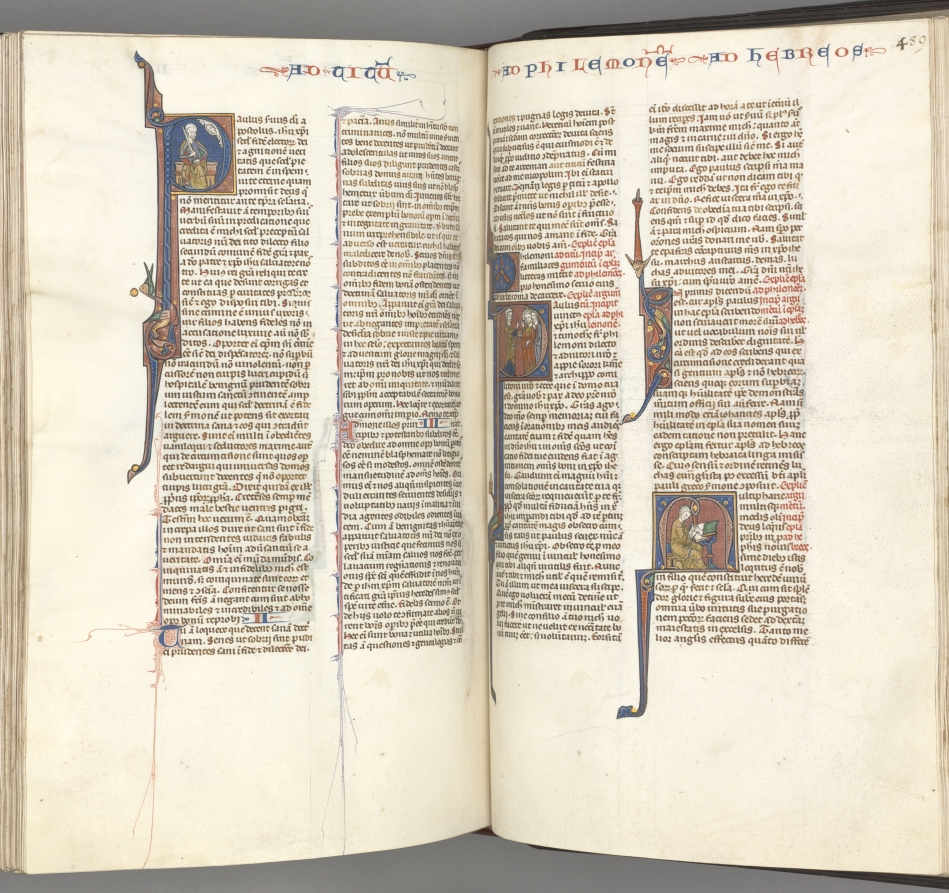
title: Fol. 458v, Titus, historiated initial P, Paul seated with a sword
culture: Southern France, Toulouse(?), 13th century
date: c. 1275–1300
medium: ink, tempera and gold on vellum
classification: Bound Volume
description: Biblical manuscripts were highly prized and important possessions of churches, monasteries, cathedral schools, and universities throughout medieval Europe. The biblical texts were known as the vulgate, the translations made by Saint Jerome in the fourth century from Hebrew and Greek into Latin, which became the definitive and official Latin version of the Roman Church. In the 13th century, the bible was, for the first time, produced as a single volume with an officially sanctioned sequence to its books and chapters as illustrated by this example. The very extensive decoration of this bible is arranged hierarchically to indicate the relative importance of the various texts so that full or almost full-page initials mark the openings of the first prologue, Genesis, and the first Gospel; historiated initials mark the beginning of each book and illuminated initials mark the Prologues.